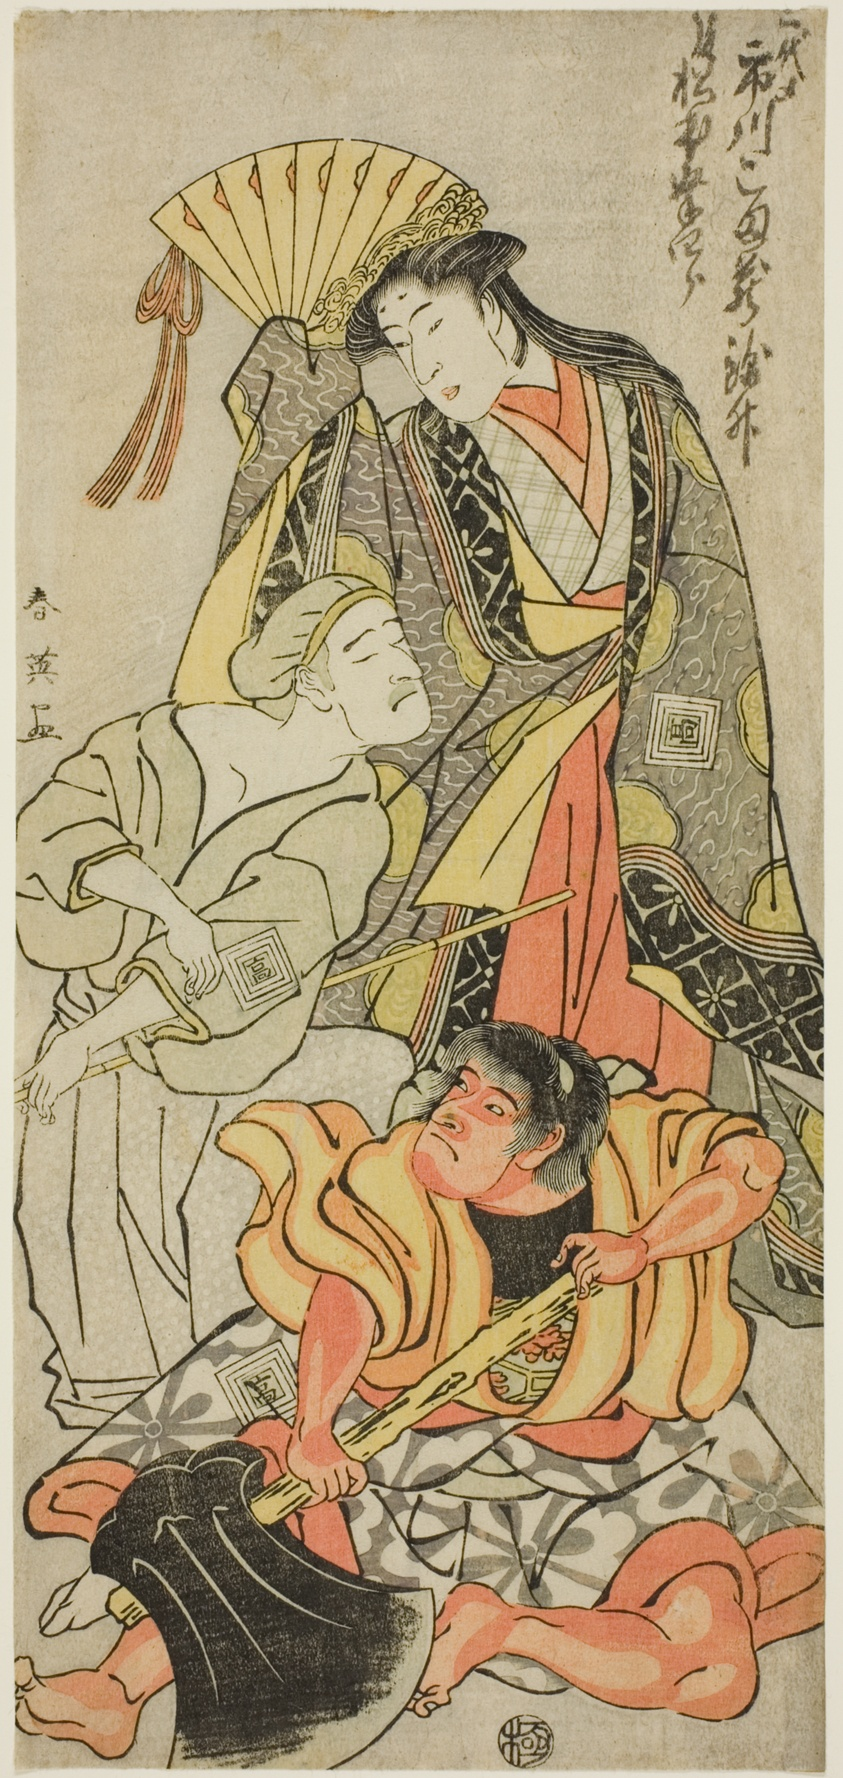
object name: Print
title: Actor Ichikawa Komazô III as Nyosan no Miya (The Third Princess), Ukare Zatô (A Blind Street Performer), and Sakata no Kaidô-maru in “Expanded Summer Festival” (“Zôho natsu matsuri”)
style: Japanese (culture or style)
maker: Katsukawa Shun’ei; Japanese, 1762–1819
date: About 1791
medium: Color woodblock print; hosoban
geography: Japan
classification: woodblock print; print; asian art